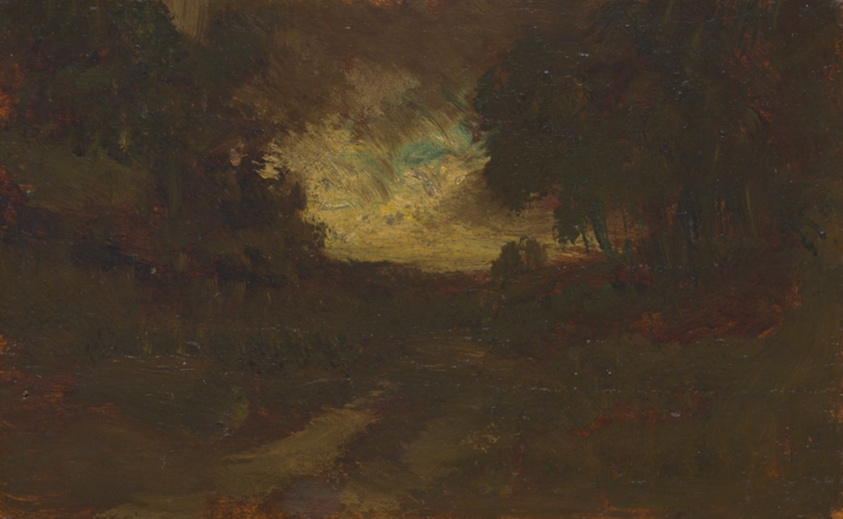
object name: Painting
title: Landscape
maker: William Keith (American, born Scotland, 1839–1911)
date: 1868-1900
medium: Oil on panel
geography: United States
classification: painting; modern and contemporary art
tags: landscape